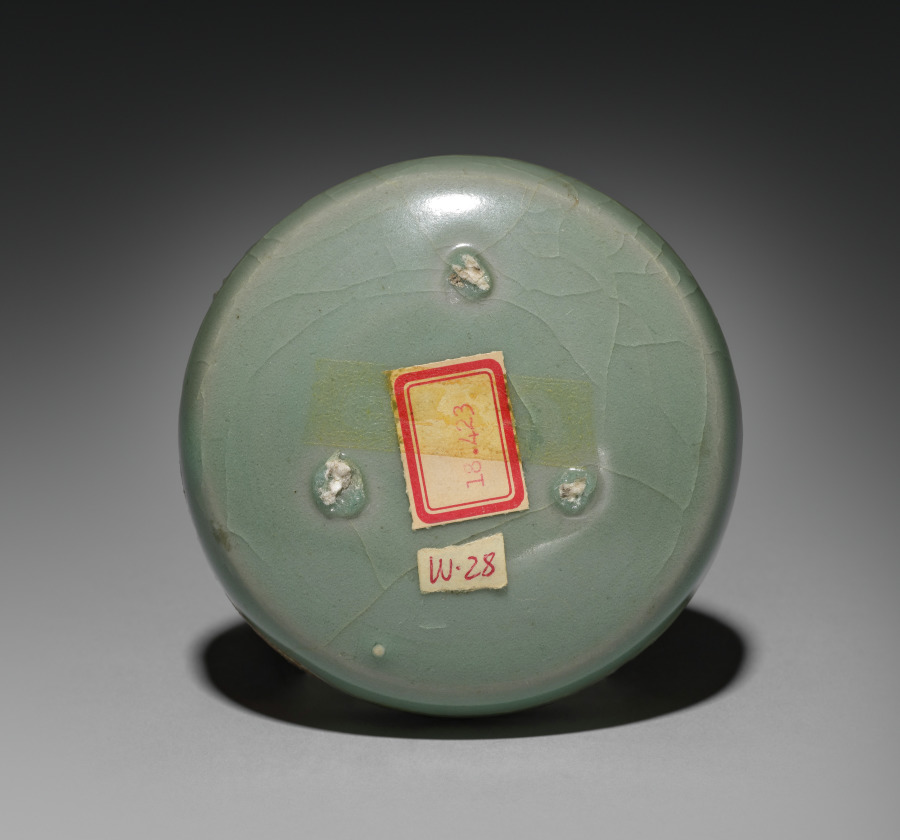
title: Box and Cover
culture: Korea, Goryeo dynasty (918–1392)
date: 918–1392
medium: celadon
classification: Ceramic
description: Celadons, spoons, seals, and bronze mirrors were the most common burial objects in tombs during the Goryeo period (918-1392). Once used to contain color powder, rouge and eyebrow gel for makeup, this small container was one of the standard goods that furnished elites' tombs. Goryeo-period women and men used the grain powder of rice or millet for whitening their skin, safflower extract for rouge, and plant ash or soot for eyebrow gel. Yet, natural-looking make-up seems to have been the most favorable one in Korea according to the travelogue by Xu Jing (1091-1153), the Chinese diplomat who visited Korea in 1123.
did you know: This ceramic container was used to store incense or cosmetics.